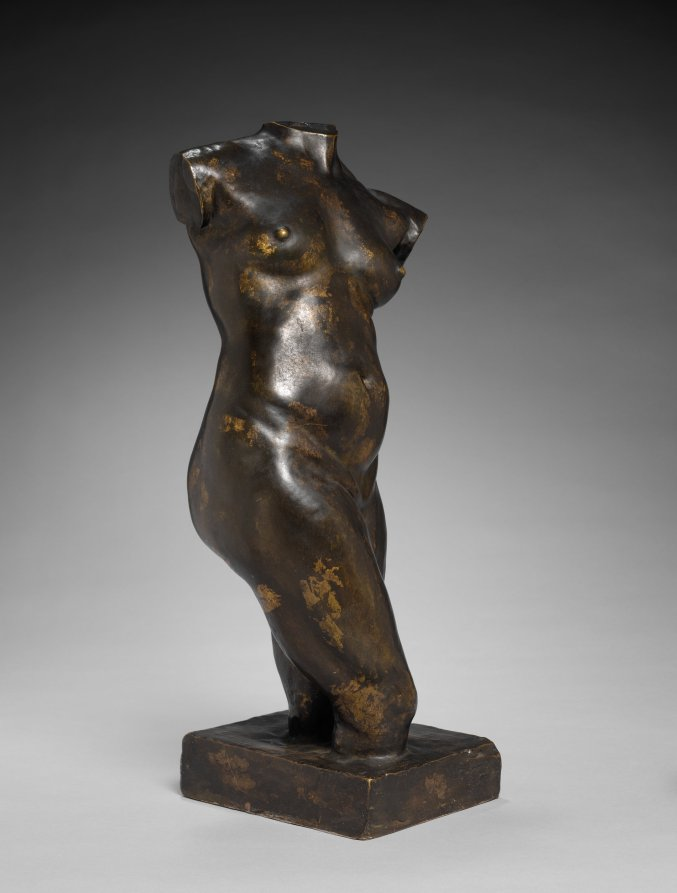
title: Torso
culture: France, 19th century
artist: Jules Dalou (French, 1838–1902)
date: c. 1850 – 1899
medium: bronze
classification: Sculpture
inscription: Signed: "J. Dalou"; "Susse Fres. Ed[ts] Paris"